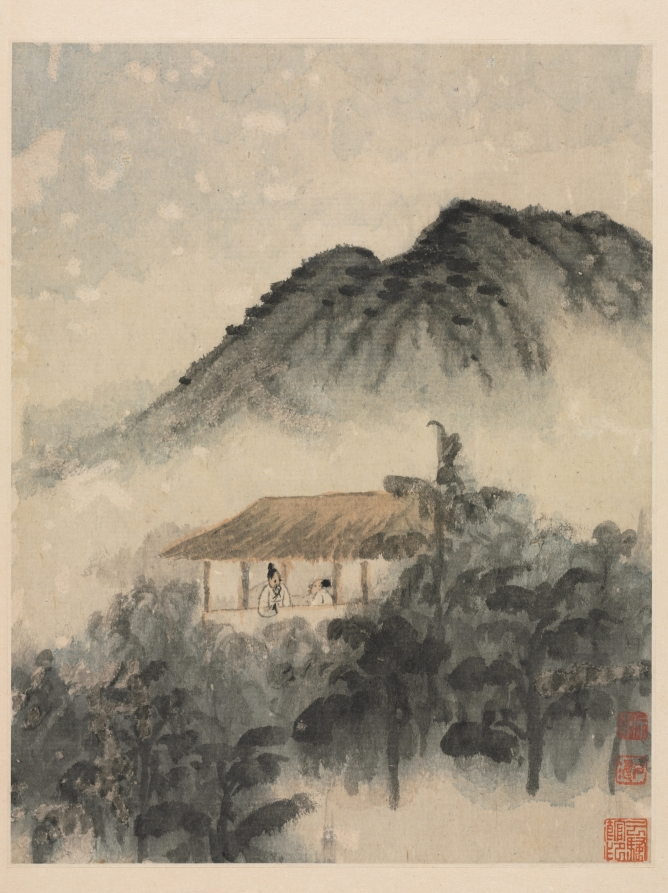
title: Reminiscences of Qinhuai River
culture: China, Qing dynasty (1644-1911)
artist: Shitao (Chinese, 1642–1707)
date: 1642–1707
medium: album leaf, ink and color on Song paper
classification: Painting